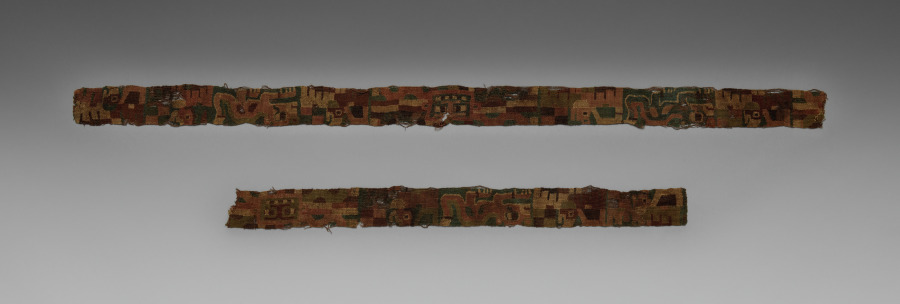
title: Fragments of a Belt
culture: Peru, South Andes, Tiwanaku style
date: c. 400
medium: camelid wool; tapestry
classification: Textile